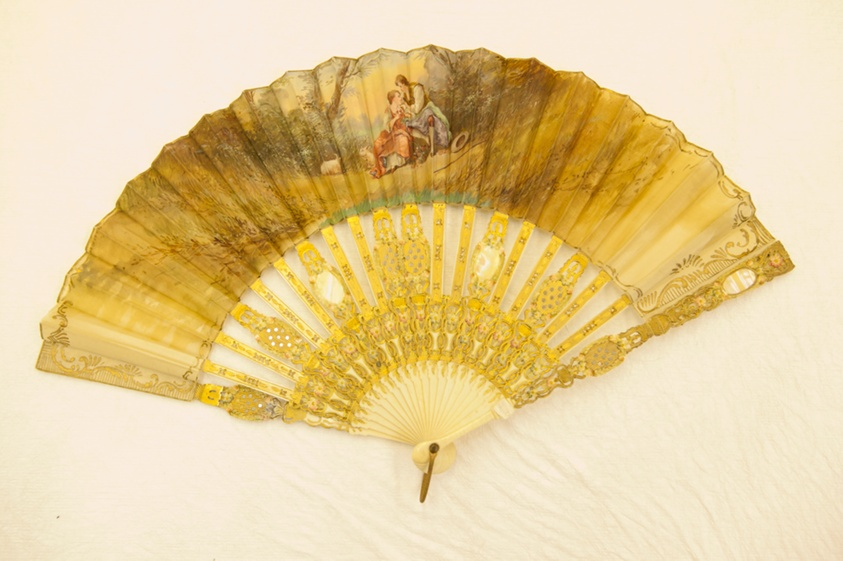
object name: Costume and Accessories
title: Fan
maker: France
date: 1875/1900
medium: Sticks and guards of ivory pierced, gilded and with insets of mother-of-pearl and marcasites; mount of silk with romantic scene painted in pastel colors; no decoration on the back; metal rivet & loop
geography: France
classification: textile; fan - weaving; costume accessory - folding fan; costume accessory; costume